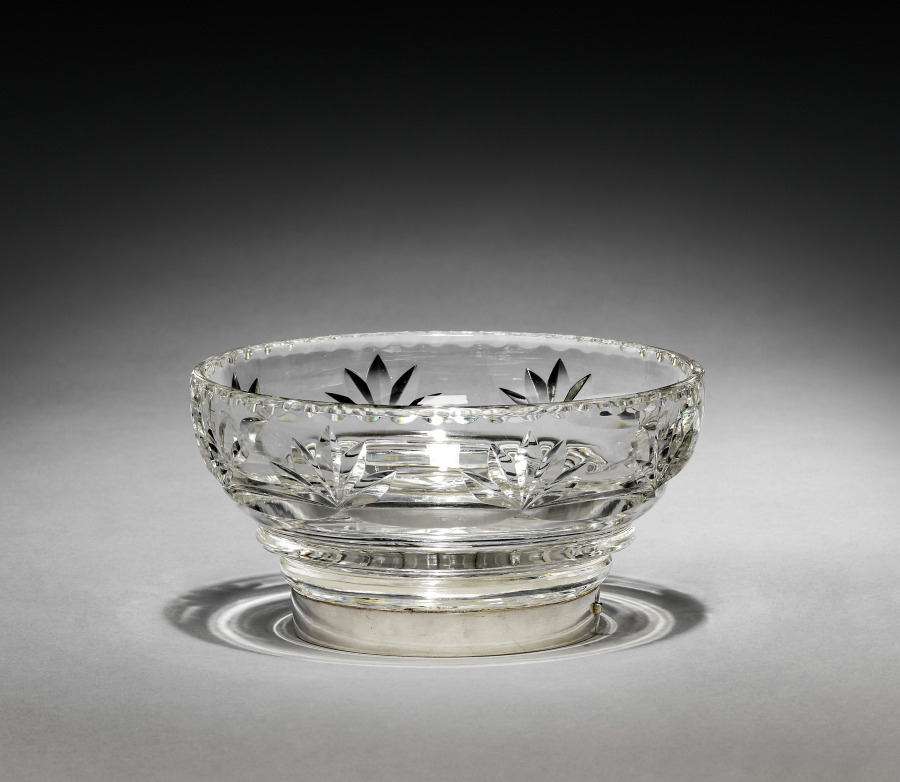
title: Compote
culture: Russian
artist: House of Fabergé (Russian, 1842–1918)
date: c. 1890–99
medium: glass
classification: Silver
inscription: Inscribed “K. Fabergé” in Cyrillic, surmounted by the double-headed Imperial eagle.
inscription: “88” silver standard